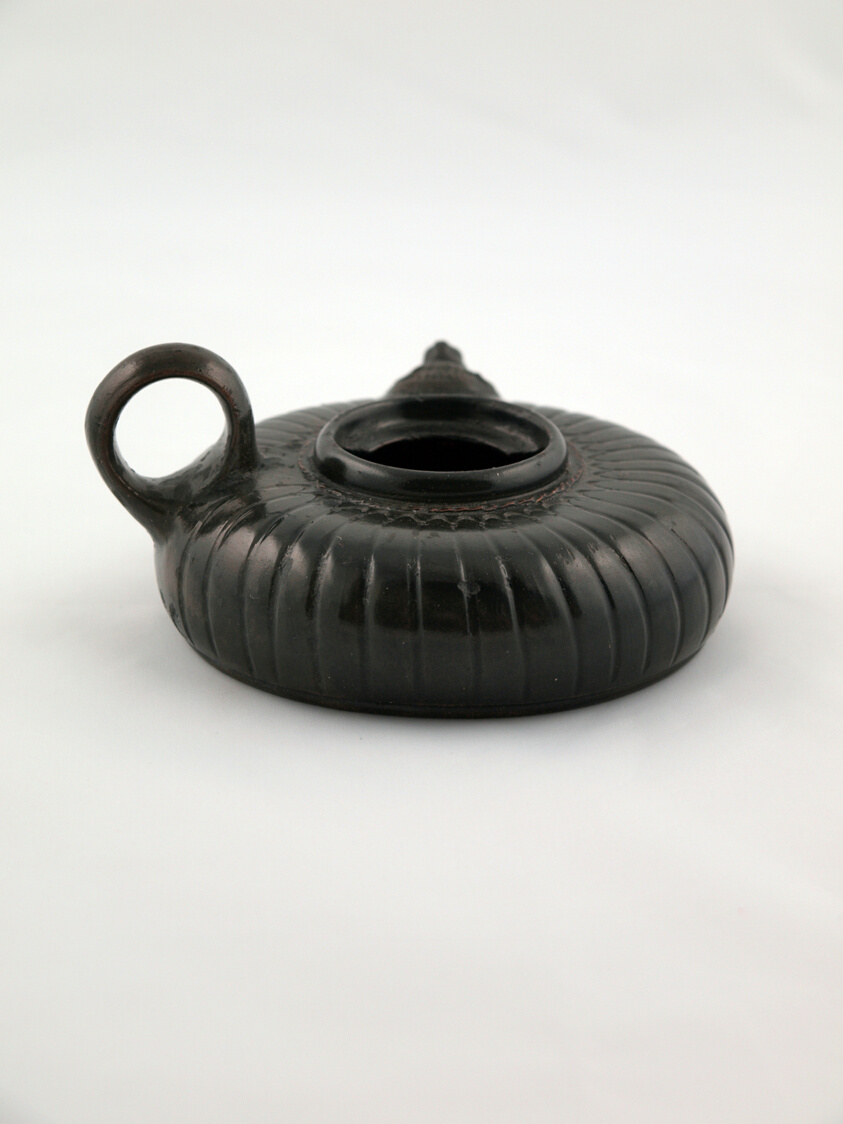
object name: Vessel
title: Guttus (Pouring Vessel)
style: greek, ancient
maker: Greek; Athens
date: 400-375 BCE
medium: terracotta, black-glaze with stamping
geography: Greece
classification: vessel; ceramics; ancient art